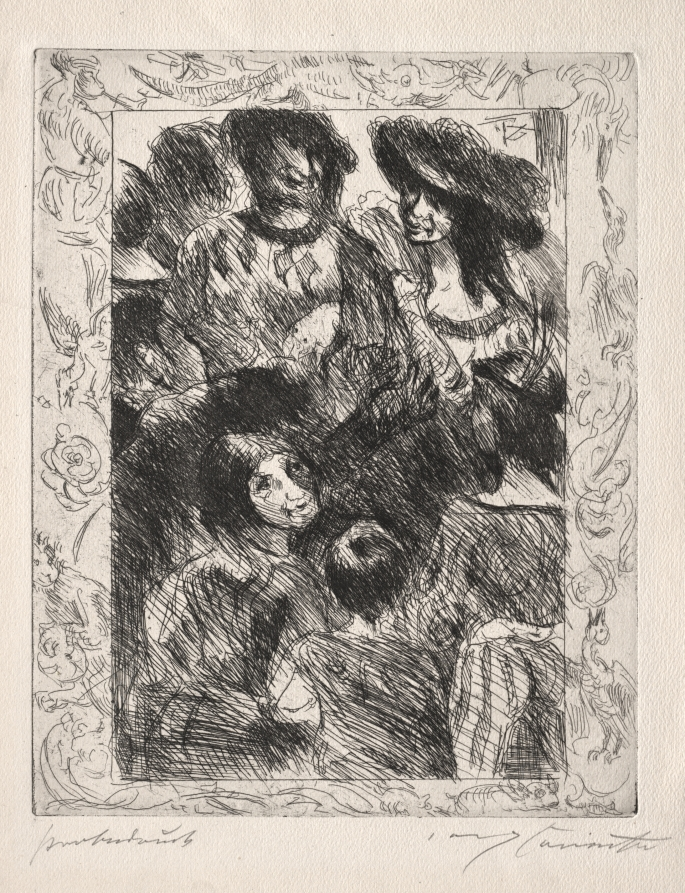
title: Weislingen and Adelheid: Illustration for Goetz von Berlichingen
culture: Germany, 20th century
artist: Lovis Corinth (German, 1858–1925)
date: 1920–1921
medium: etching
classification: Print